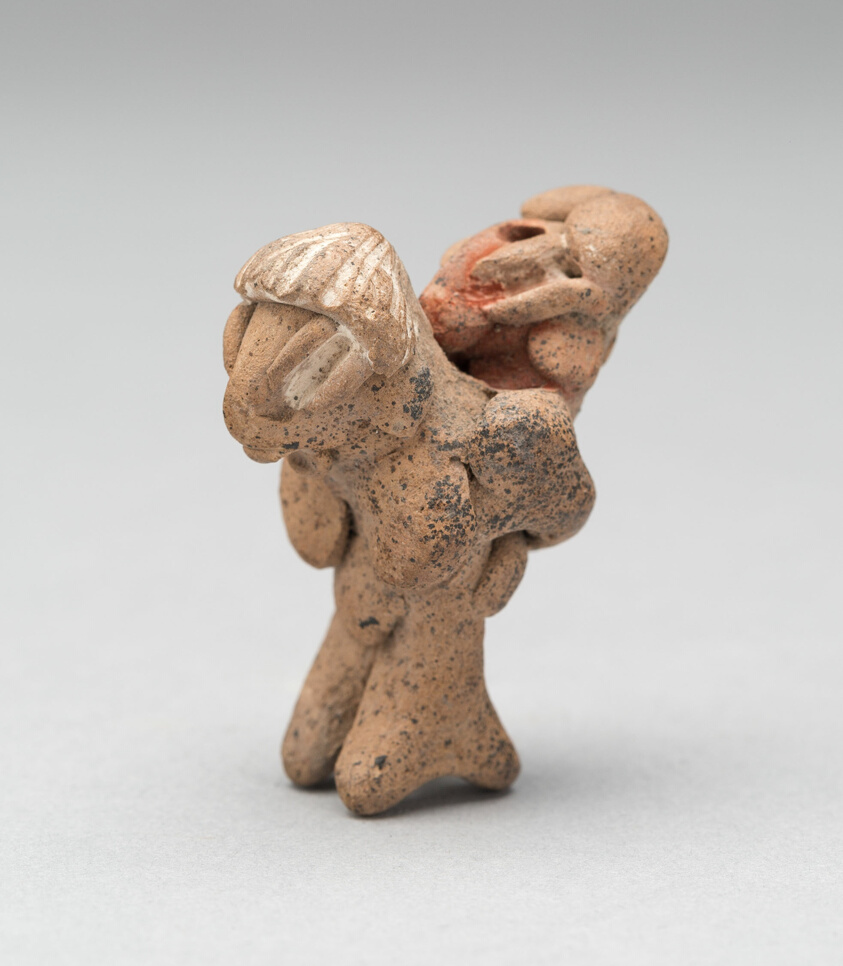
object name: Sculpture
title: Figurine Depicting a Female Carrying a Child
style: chupicuaro, Arts of the Americas, mesoamerican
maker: Chupícuaro (Guanajuato or Michoacán, Mexico)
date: 500–300 BCE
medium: Ceramic and pigment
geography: Chupícuaro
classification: earthenware; ceramics; sculpture; art of the americas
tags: mothers, children